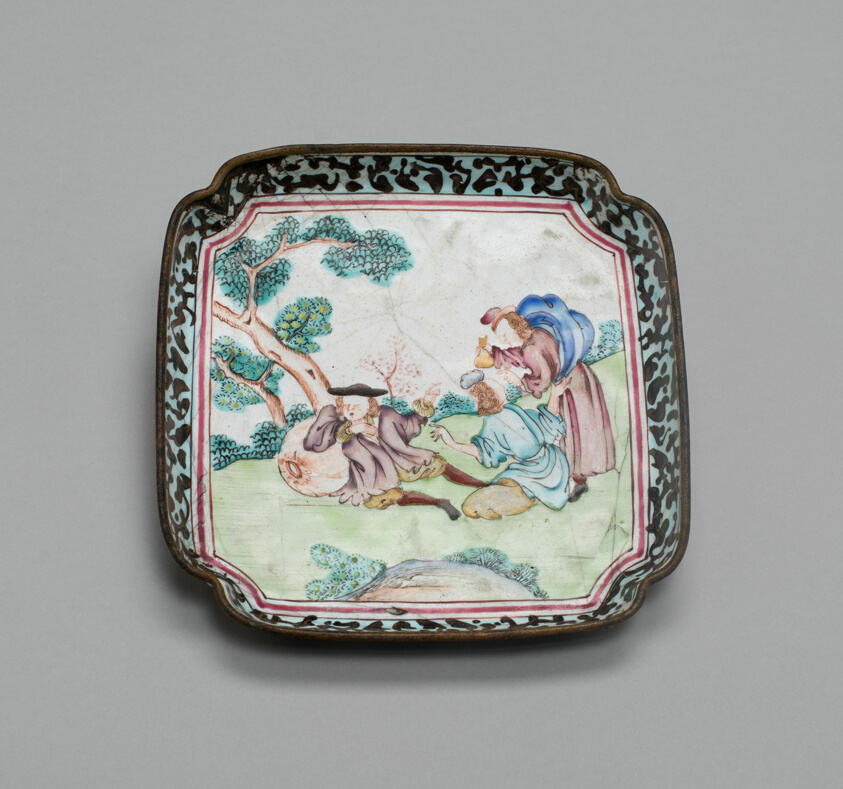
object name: Metalwork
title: Tray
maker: China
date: 1730/70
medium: Polychrome enamel on copper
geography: China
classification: tray; enamel; european decorative arts; metalwork